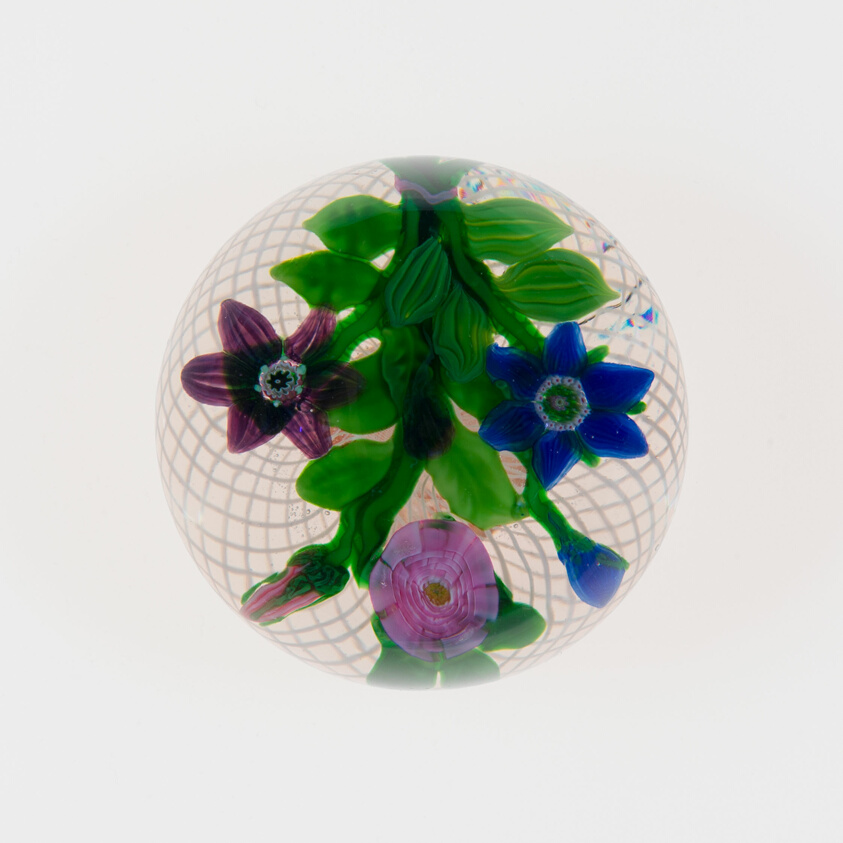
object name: Glass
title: Paperweight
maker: Clichy Glassworks (Cristalleries de Clichy); Clichy, France, 1837-1885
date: c. 1845–60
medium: Glass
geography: Clichy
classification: paperweight; glass